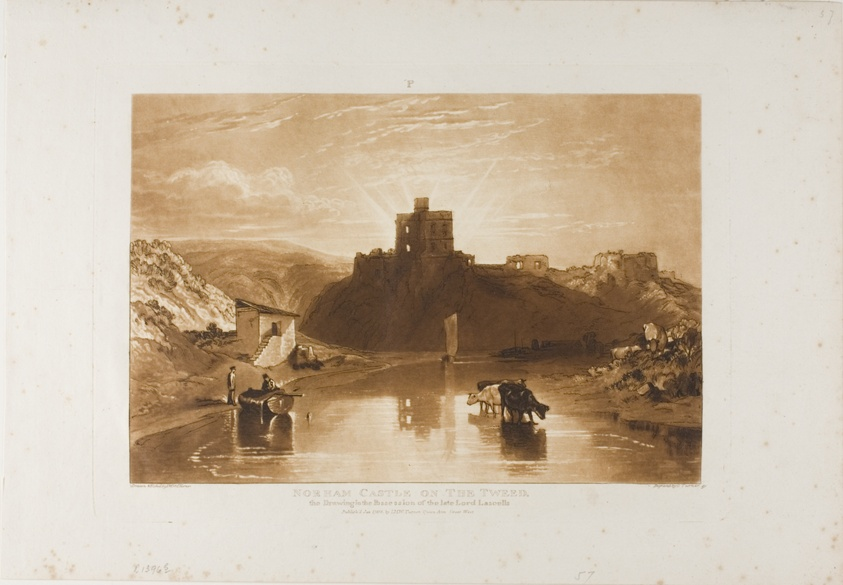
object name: Print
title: Norham Castle, plate 57 from Liber Studiorum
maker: Joseph Mallord William Turner (English, 1775-1851); Engraved by Charles Turner (English, 1773-1857)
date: published January 1, 1816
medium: Etching and engraving in brown on ivory laid paper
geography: England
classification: etching; print; prints and drawing